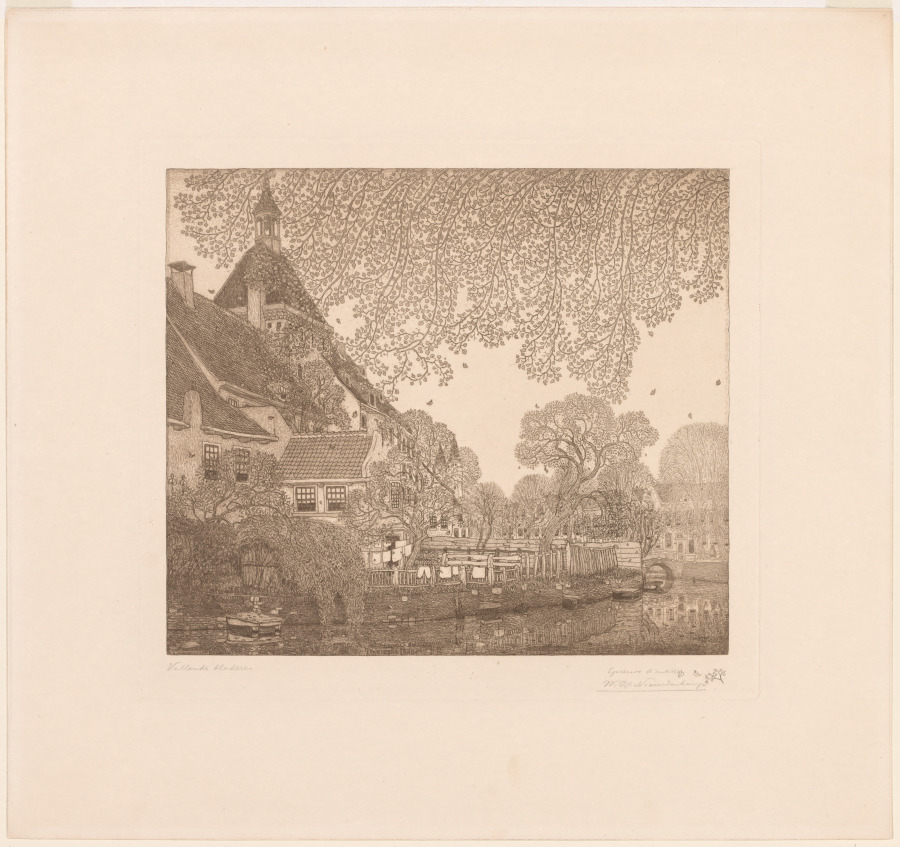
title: Falling Leaves, Amersfoort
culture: Netherlands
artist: Wynand Otto Jan Nieuwenkamp (Dutch, 1874–1950)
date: 1907–8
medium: etching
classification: Print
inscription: Lower left margin, in graphite: Vallende bladeren; lower right margin, in graphite: Épreuve d'artiste / W.O.J. Nieuwenkamp To the right of signature is an etching of a branch with leaves, and two falling leaves In plate, lower left: W.O.J. Nieuwenkamp.